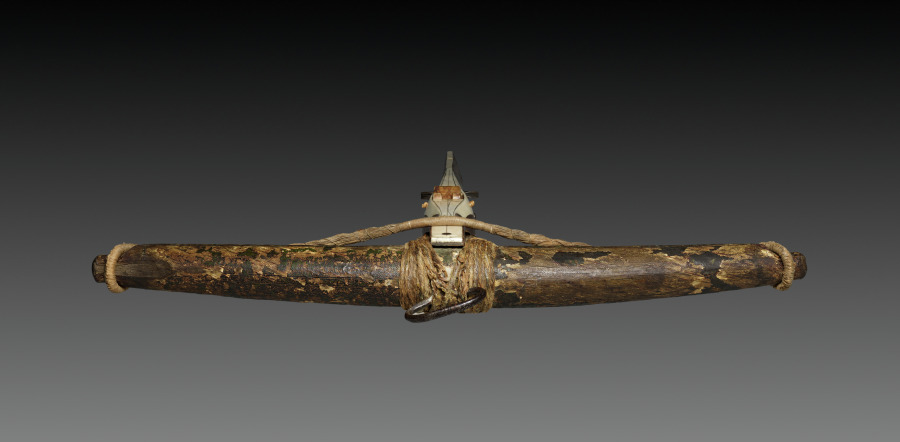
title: Crossbow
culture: Germany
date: c. 1460–70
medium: wood (walnut?) inlaid with bone; horn; iron and steel; composite bow (horn and parchment)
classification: Arms and Armor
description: The cranequin, or winding device sitting on top of the crossbow, made it easier to span for reloading. With a full quiver, a container for bolts and arrows, a hunter could bring home plenty of meat.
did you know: In every army in Europe crossbowmen were considered an elite corps, and as such occupied the central position in battle formations.